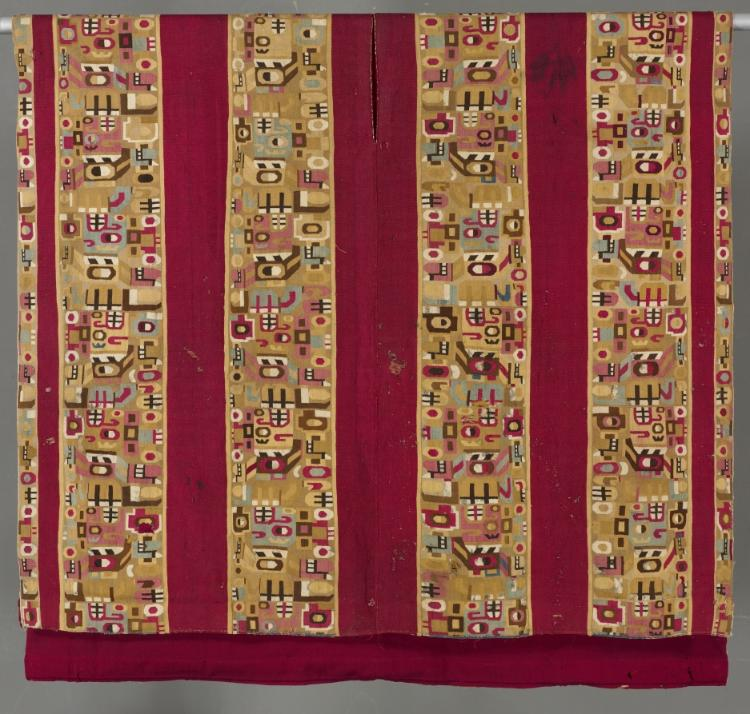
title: Tunic with Sacrificer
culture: South America, Peru, Central Andes, Middle Horizon, Wari people, 7th-11th century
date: 600–1000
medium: camelid-fiber, cotton; tapestry weave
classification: Textile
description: An extremely abstract supernatural sacrifice repeats in different colors and orientations across the body of this tunic, which was shortened on one side in antiquity. Look for the toothy black-and-white mouth in the sacrificer's upward-gazing head; other facial features include a button nose and a vertically divided eye. The figure holds the L-shaped haft of an axe behind its back and, at the front of its body, a short staff with a severed, upside-down human head on the top.